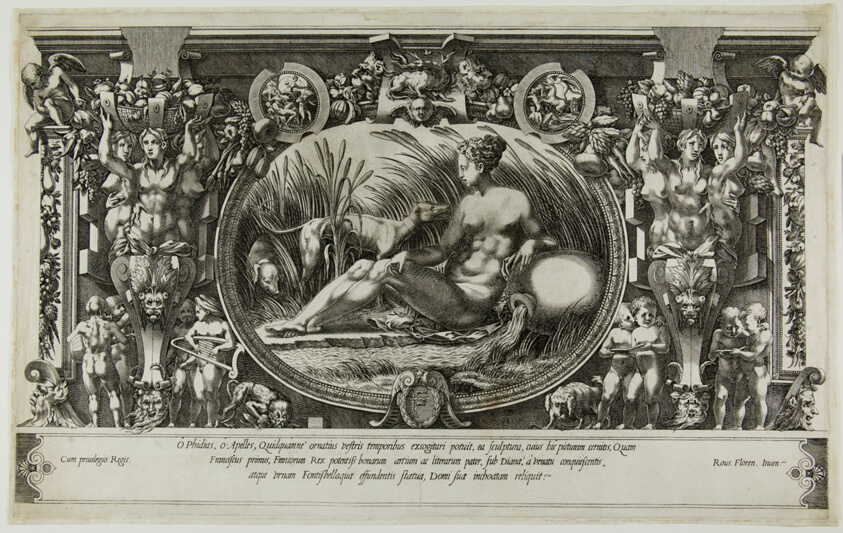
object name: Print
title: The Nymph of Fontainebleau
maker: Pierre Milan (French, died 1557); after Rosso Fiorentino (Italian, 1494-1540)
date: 1554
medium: Engraving on cream laid paper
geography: France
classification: engraving; print; prints and drawing